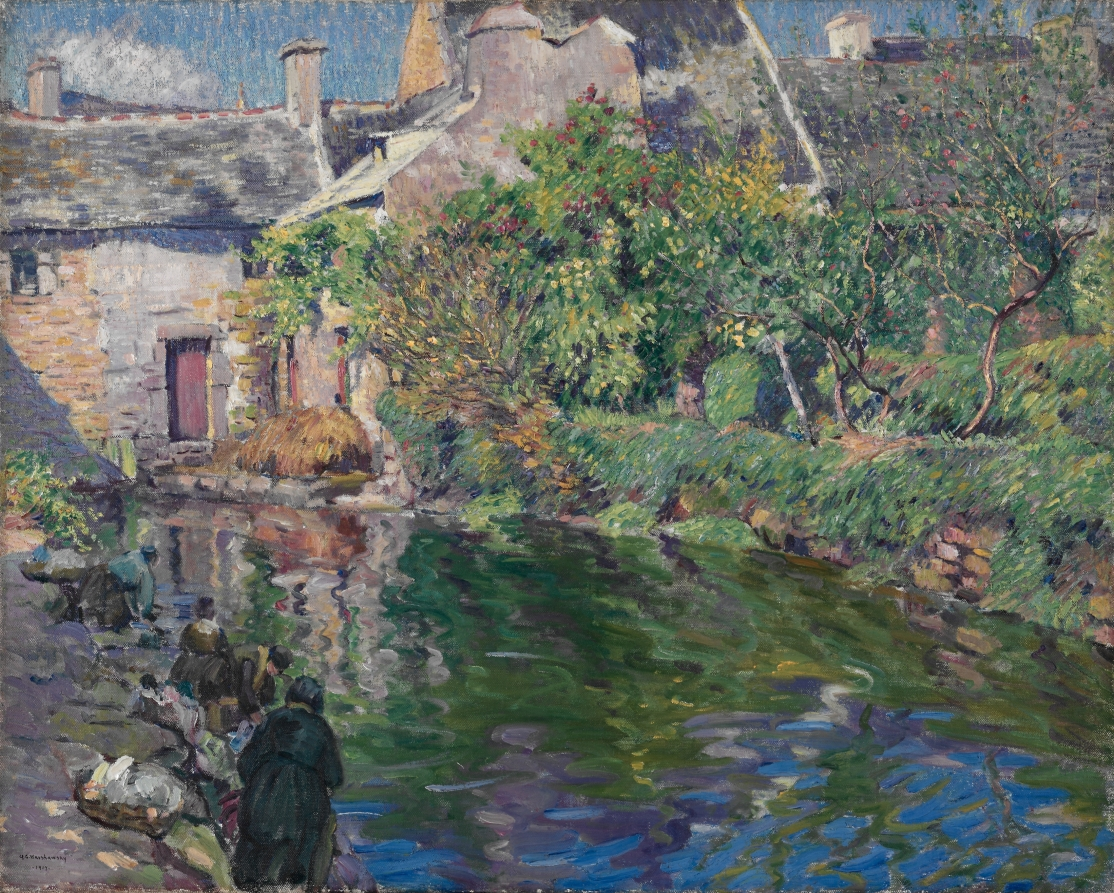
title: Washerwomen at Goyen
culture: America, Ohio, Cleveland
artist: Abel George Warshawsky (American, 1883–1962)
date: 1917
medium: oil on canvas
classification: Painting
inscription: signed lower left: "A. G. Warshawsky / -1917-"